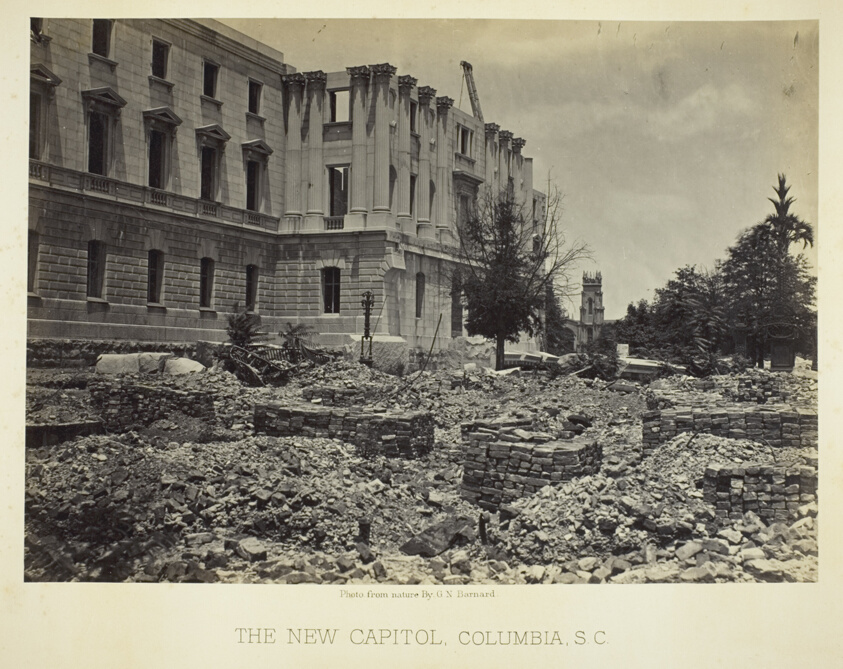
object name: Photograph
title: The New Capitol, Columbia, SC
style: 19th century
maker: George N. Barnard (American, 1819–1902)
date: 1865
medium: Albumen print, plate 52 from the album "Photographic Views of the Sherman Campaign" (1866)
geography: United States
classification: albumen silver print; photographic process; photography; photograph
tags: Collected by Hugh Edwards, Sherman's Campaign 1866